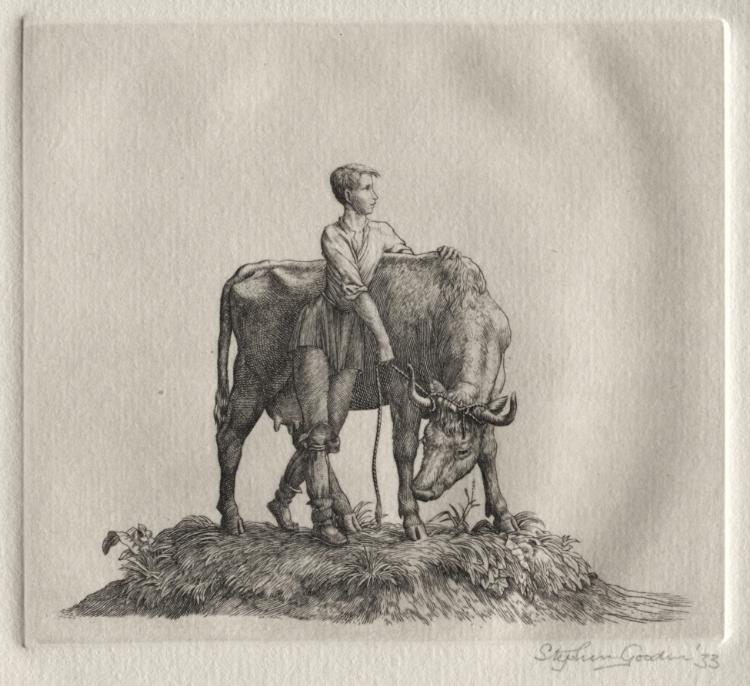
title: Illustration for "Peronnik the Fool": Frontispiece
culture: England, 20th century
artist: Stephen Gooden (British, 1892–1955)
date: 1933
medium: engraving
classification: Print